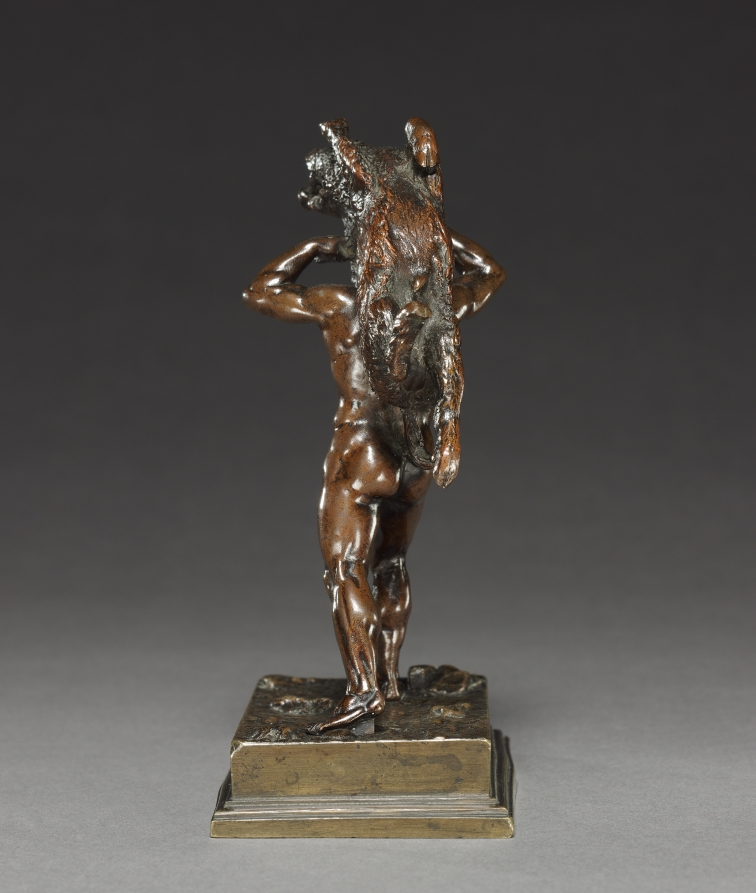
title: Hercules Carrying the Erymanthean Boar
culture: France, 19th century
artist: Antoine-Louis Barye (French, 1796–1875)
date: c. 1820–1830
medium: bronze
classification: Sculpture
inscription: signed on base: "BARYE."